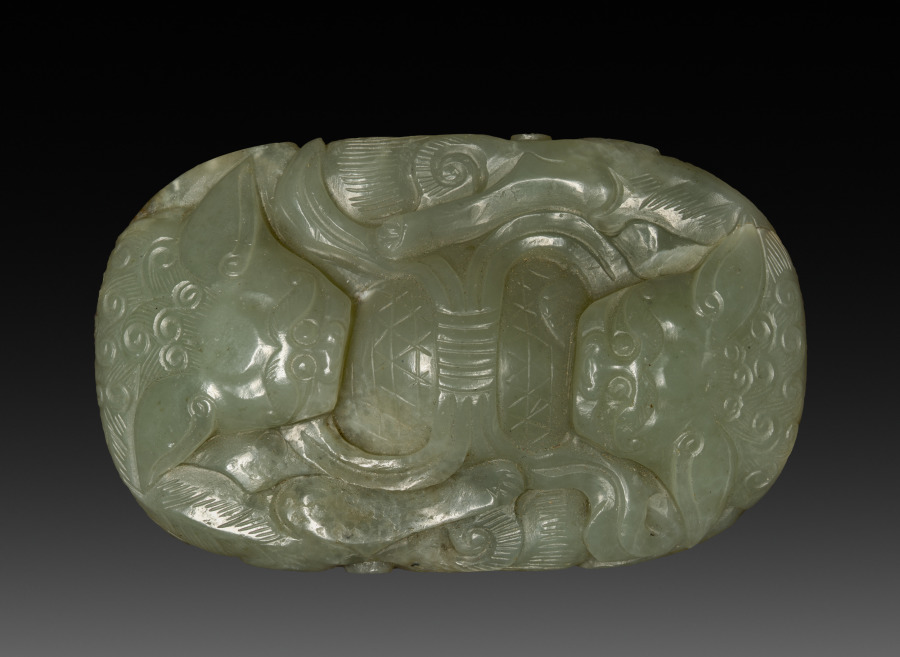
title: Buckle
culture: China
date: 1900s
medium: green jade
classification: Jewelry